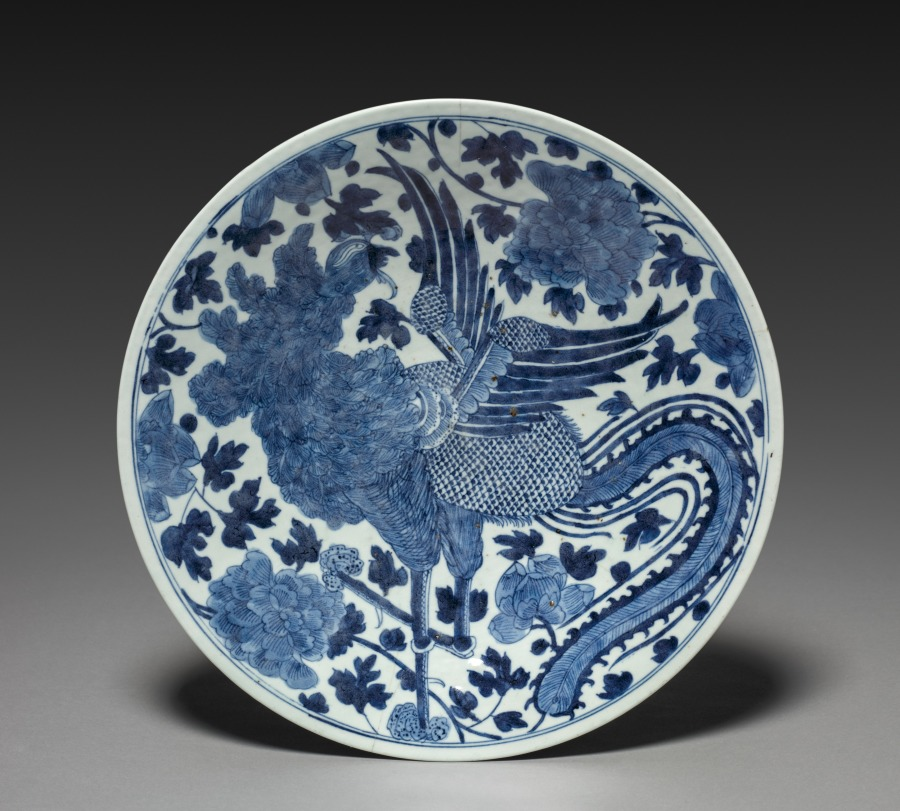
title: Plate: Arita Ware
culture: Japan, Edo period (1615–1868)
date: 1615–1868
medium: porcelain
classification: Ceramic